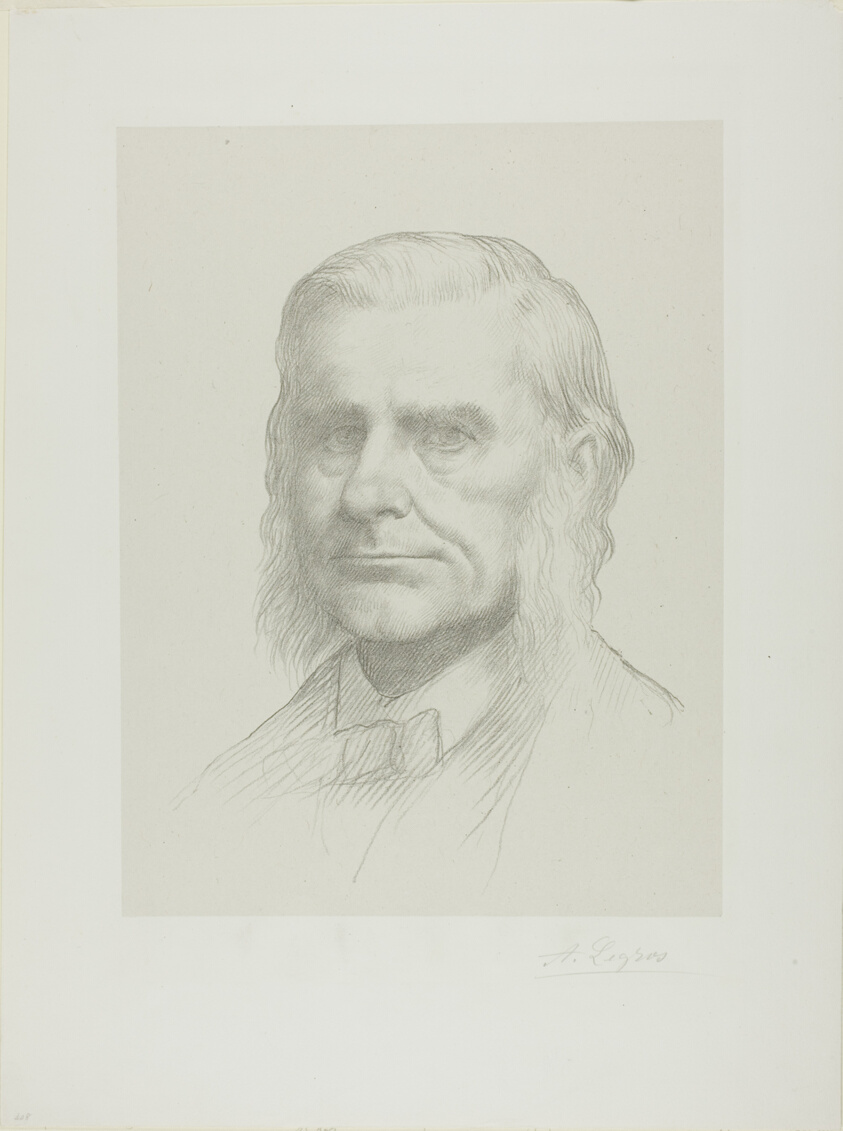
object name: Print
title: Portrait of Professor Huxley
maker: Alphonse Legros (French, 1837-1911)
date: 1891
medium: Lithograph in black on light gray China paper, laid down on ivory wove paper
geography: France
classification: lithograph; print; prints and drawing